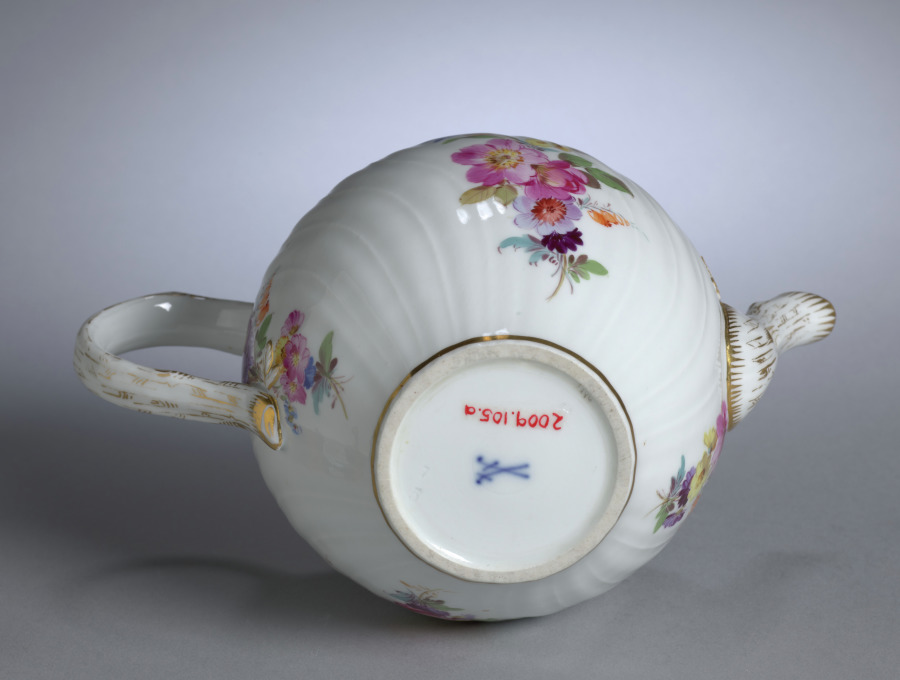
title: Teapot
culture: Germany, Meissen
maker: Meissen Porcelain Factory (German, est. c. 1710)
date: c. 1750–70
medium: porcelain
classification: Ceramic